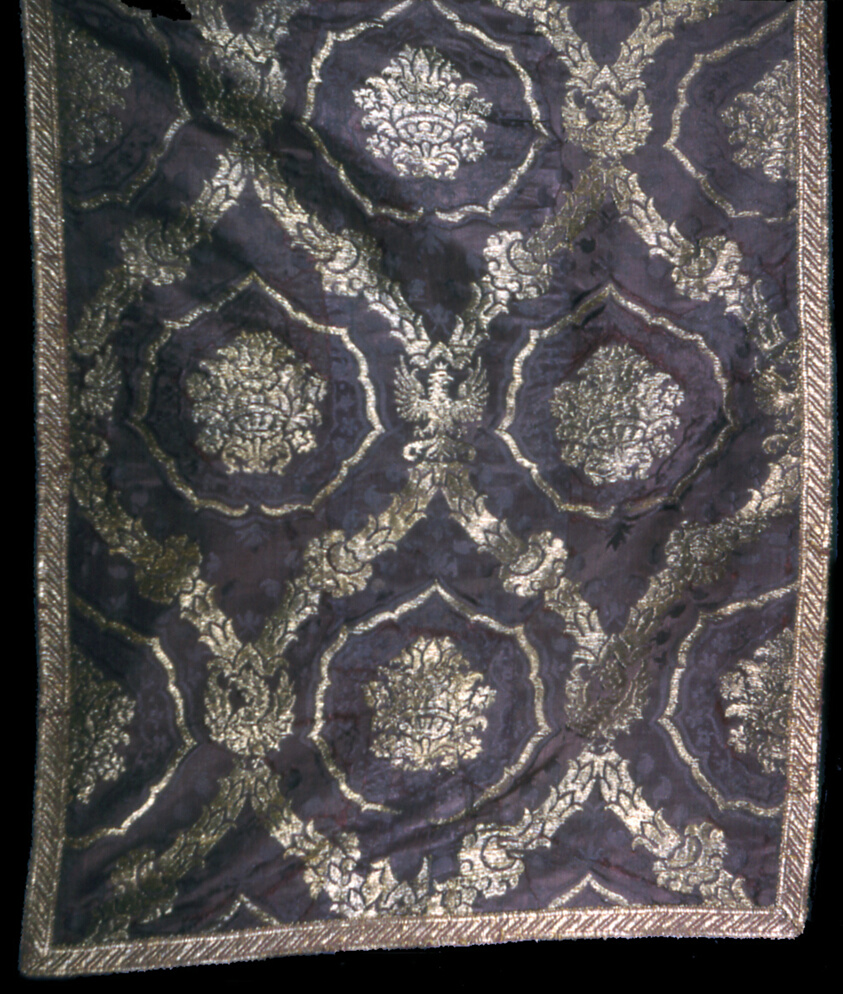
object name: Textile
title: Panel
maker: Italy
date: 16th century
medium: Silk and gilt-metal-strip-wrapped silk, 4:1 satin damask weave with supplementary brocading wefts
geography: Italy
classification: textile; weaving